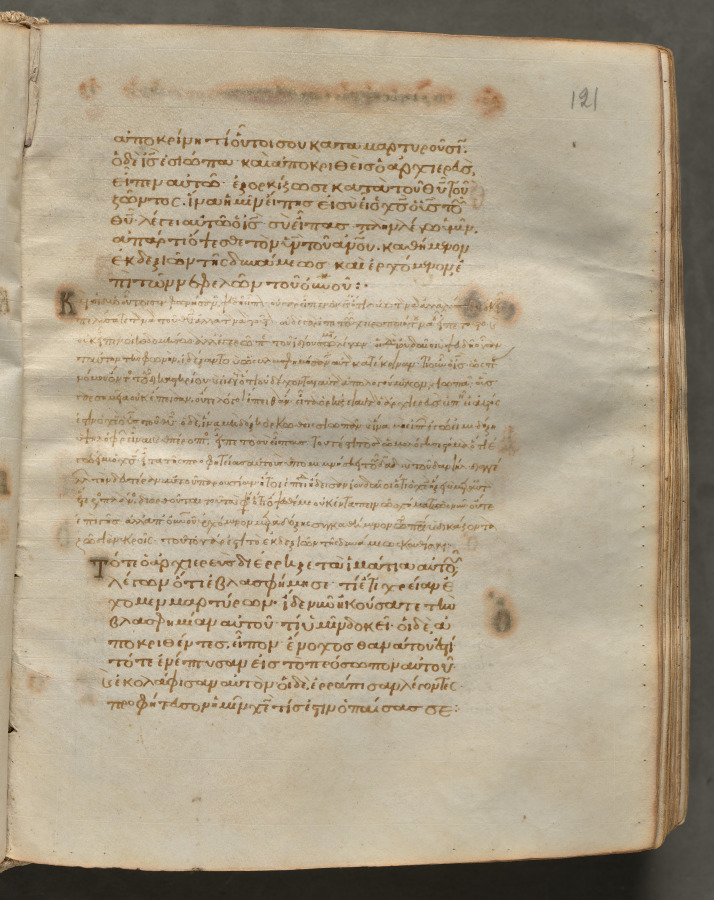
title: Text, folio 121 (recto), from a Gospel Book with Commentaries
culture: Byzantium, Constantinople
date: c. 1000–1100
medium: ink, tempera, and gold on vellum; leather binding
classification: Bound Volume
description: Each of the four gospels in this book opens on a page with brilliantly illuminated borders depicting the author of the text as well as birds-principally peacocks, symbols of the immortality of the soul-and fountains, representing the fountain of life and the salvation of the soul. This volume consists of 428 leaves with texts in Greek. Its level of sophistication suggests that it was probably written and decorated in a monastery in Constantinople.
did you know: Gospel Books were carried in procession through Byzantine churches.